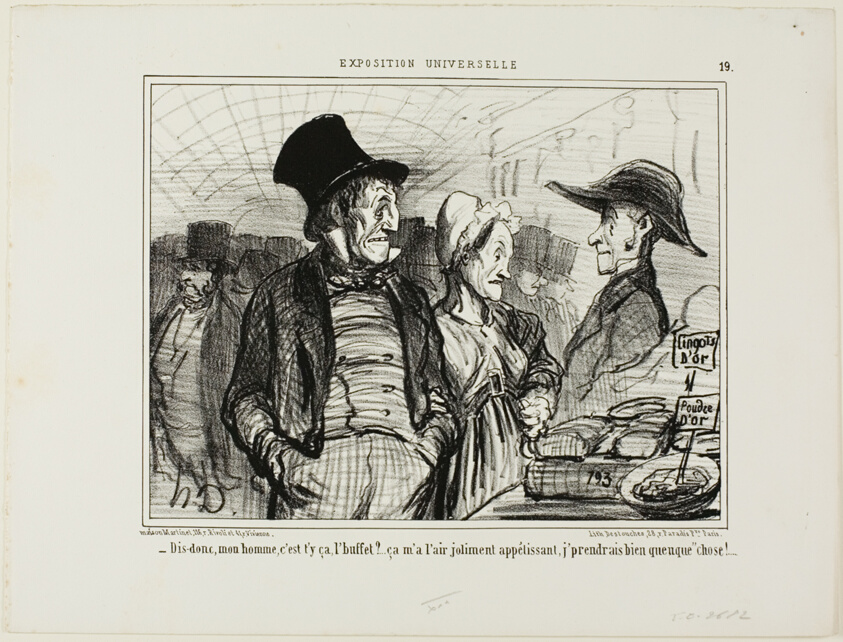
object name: Print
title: “- Tell me, my good man, is this the buffet?... it looks quite appetizing to me, I wouldn't mind having something....,” plate 19 from L'exposition Universelle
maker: Honoré Victorin Daumier; French, 1808-1879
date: 1855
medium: Lithograph in black on white wove paper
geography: France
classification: lithograph; print; prints and drawing